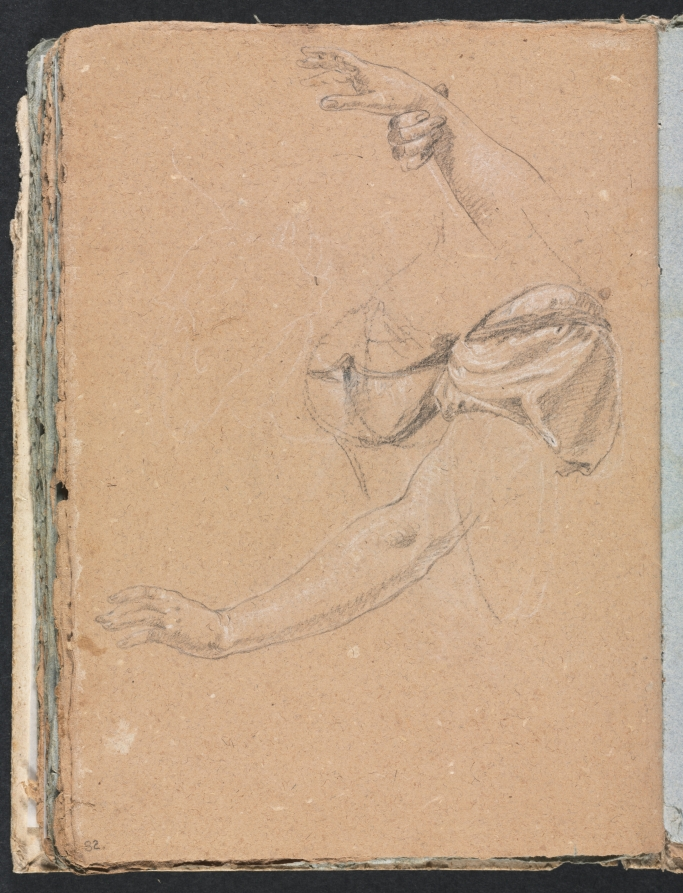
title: Verona Sketchbook: Female arms and hands with drapery (page 82)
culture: Italy, 18th century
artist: Francesco Lorenzi (Italian, 1723–1787)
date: 1760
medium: black chalk with white heightening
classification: Bound Volume